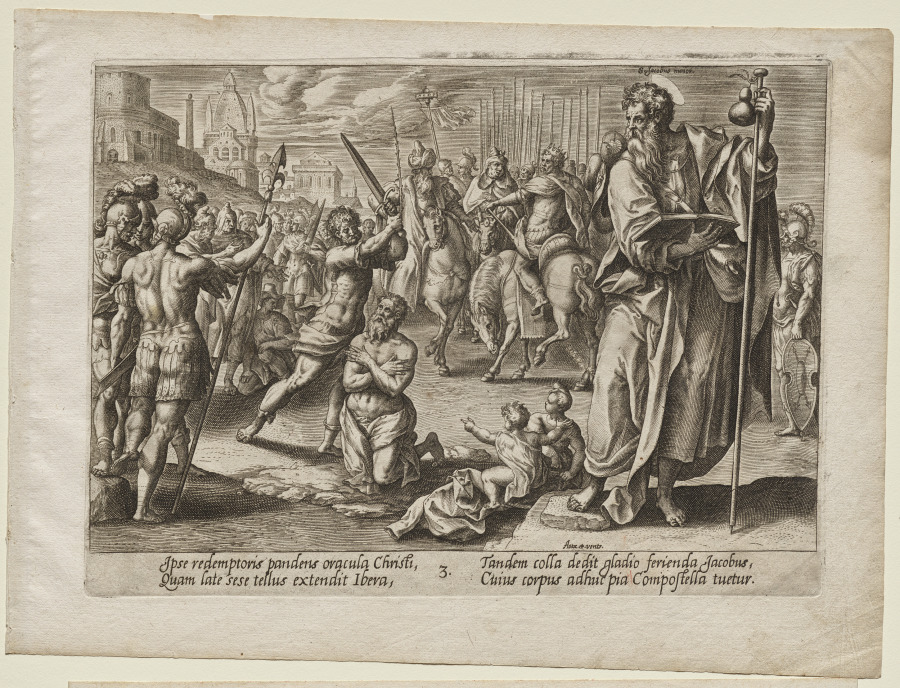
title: St. James the Great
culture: Netherlands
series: Christ, St. Paul, and the Twelve Apostles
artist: Hendrick Goltzius (Dutch, 1558–1617)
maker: after Maarten de Vos (Flemish, 1532–1603)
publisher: Aux Quatre Vents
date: c. 1578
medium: engraving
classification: Print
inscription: Aux.4.vents bottom right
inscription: Verses in margin: Jpse redemptoris…Compostella tueter. Above nimbus: S. Jacobus maior. Numbered 3.